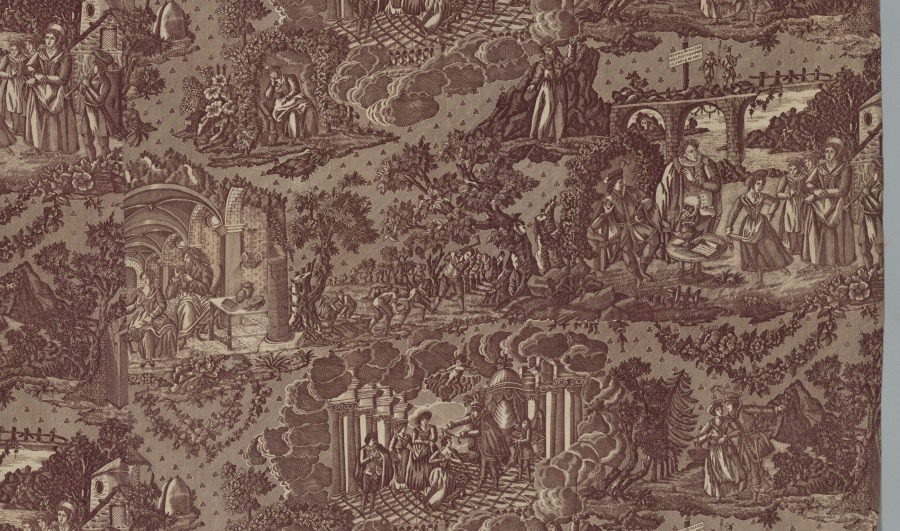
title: "La Treve de Dieu" (The Truce of God)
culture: France, Nantes or Rouen ?, early 19th century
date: c. 1825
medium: copperplate printed cotton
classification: Textile